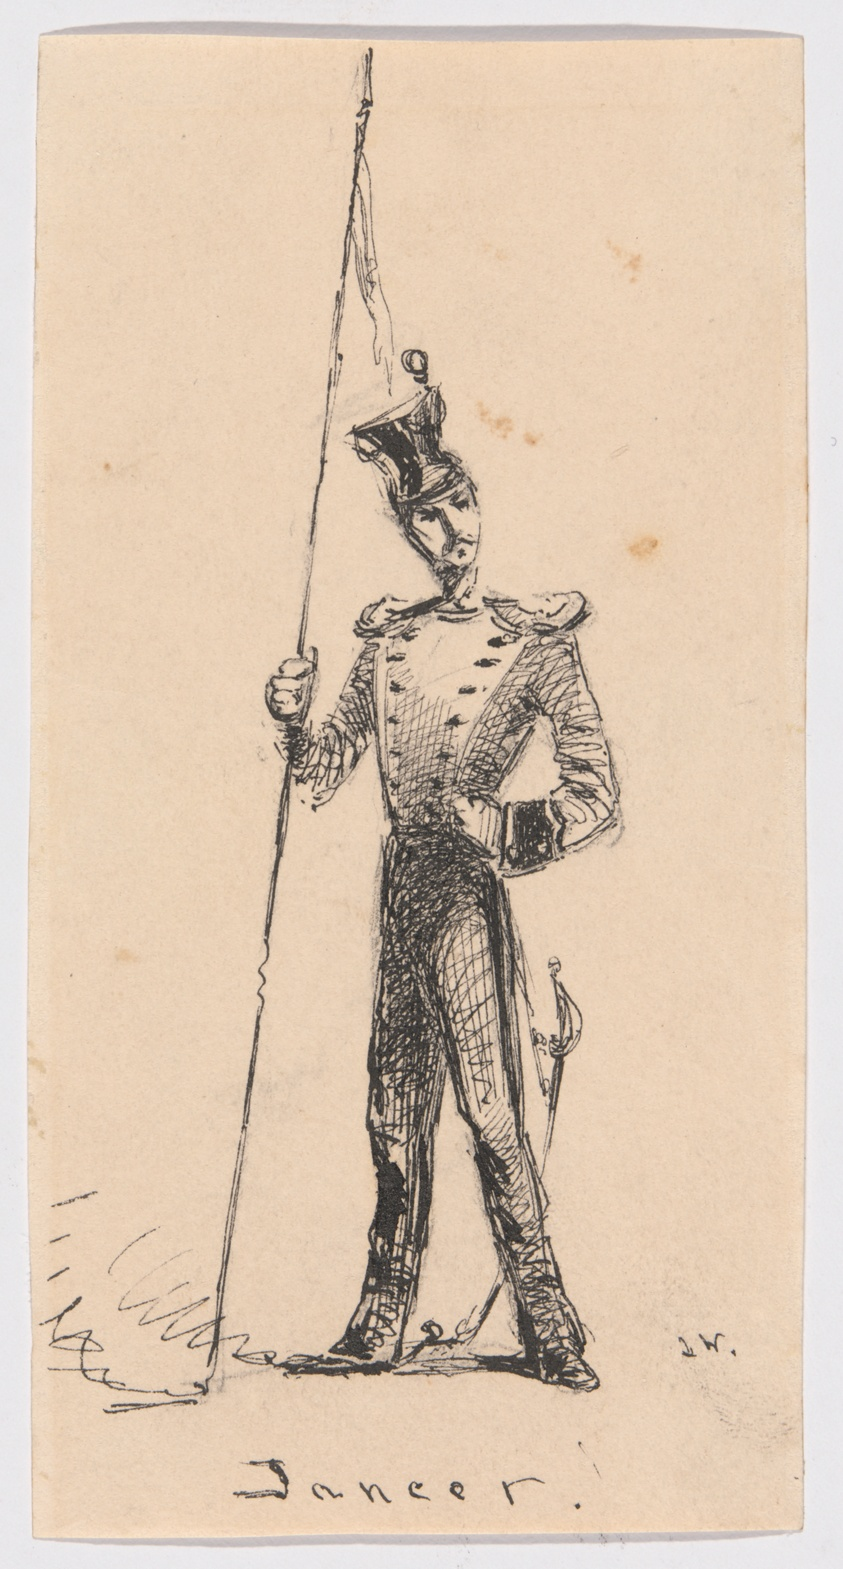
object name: Drawing and Watercolor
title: Lancer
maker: James McNeill Whistler (American, 1834-1903)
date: 1854/55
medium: Pen and black ink over graphite on cream wove paper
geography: United States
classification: pen and ink drawings; drawings (visual works); prints and drawing; paper